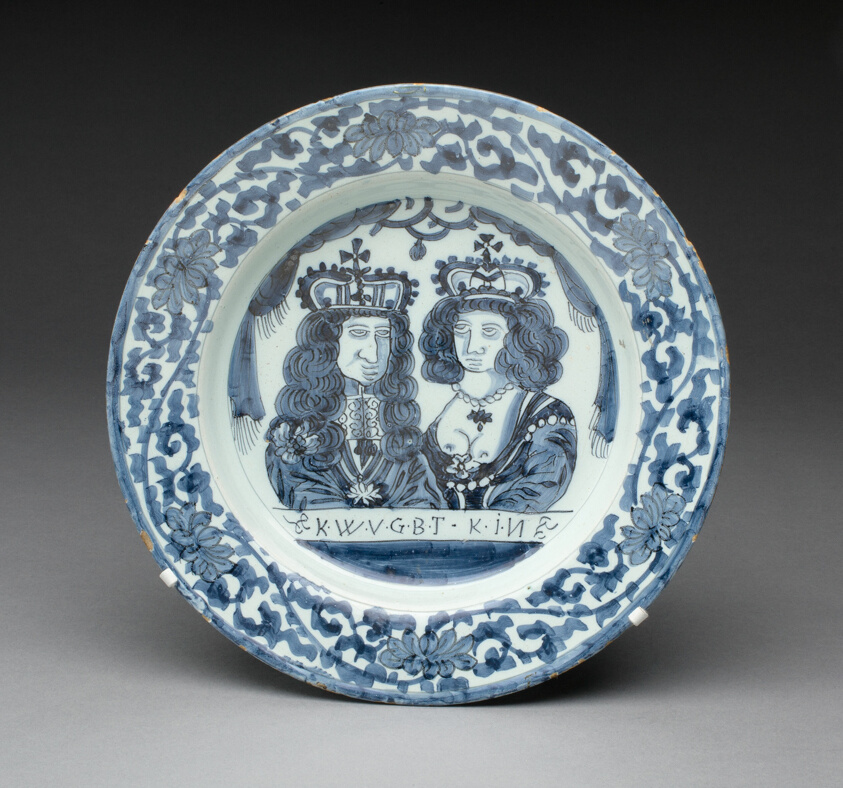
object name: Ceramics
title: Plate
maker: Delft, Netherlands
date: c. 1700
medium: Tin-glazed earthenware (Delftware)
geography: Delft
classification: plate (general, dish); dish (vessel); earthenware; ceramics; european decorative arts